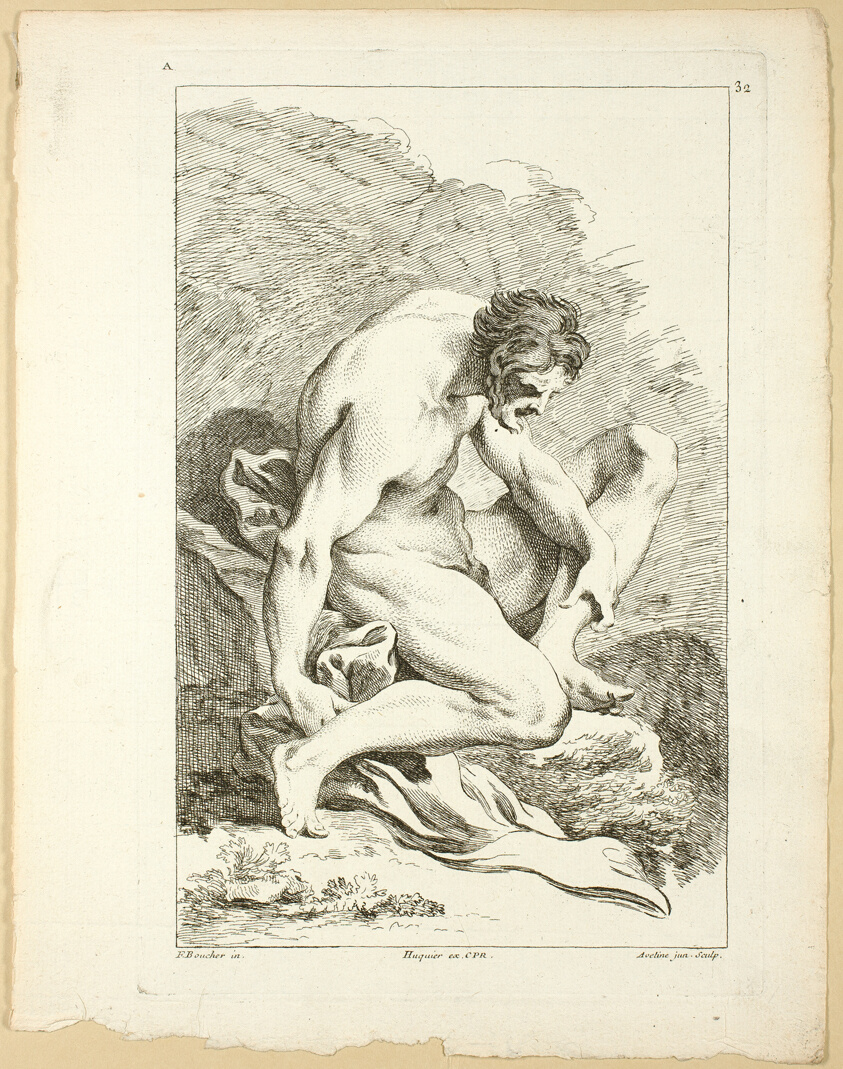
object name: Print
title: Page 32, from Premier Livre de Figures d’Academies Gravées en Partie par les Professeurs de l’Académie Royale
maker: Pierre Aveline (French, 1702-1760); after François Boucher (French, 1703-1770); printed by Gabriel Huquier (French, 1695-1772); published by Charles-Antoine Jombert (French, 1712-1784)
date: 1737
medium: Etching on ivory laid paper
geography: France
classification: etching; print; prints and drawing